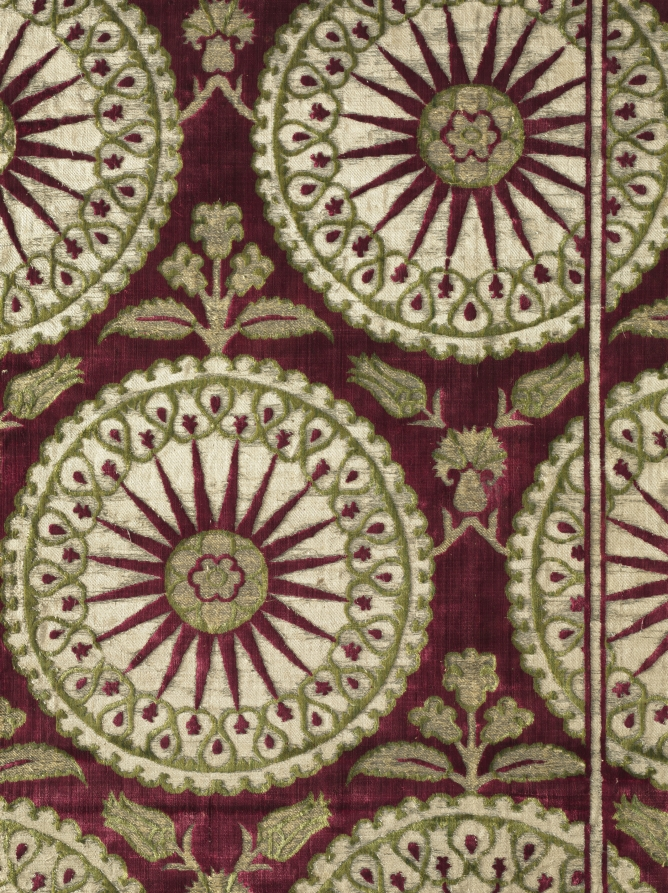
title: Brocaded velvet cover with sunbursts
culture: Turkey, Istanbul or Bursa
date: early 1600s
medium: velvet, brocaded: silk, gilt- and silver-metal thread, and cotton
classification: Textile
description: The rare sunburst pattern contrasts in its boldness with delicate floral motifs; the sunburst’s dynamic rays terminate in small tulips bearing hyacinths that alternate with peacock feathers. Interstitial motifs display the favorite telltale Turkish flora of carnations, tulips, and hyacinths. Quantities of luxury textiles were made for the Ottoman sultans, who were the largest consumers of textiles in the Western world by the mid-1500s and early 1600s. Textiles were lavishly displayed in ceremonies, presented as splendid robes of honor, and visible as furnishing fabrics in the Topkapi Palace in Istanbul where they spoke to the vast power and unfathomable wealth of the Ottoman Empire.